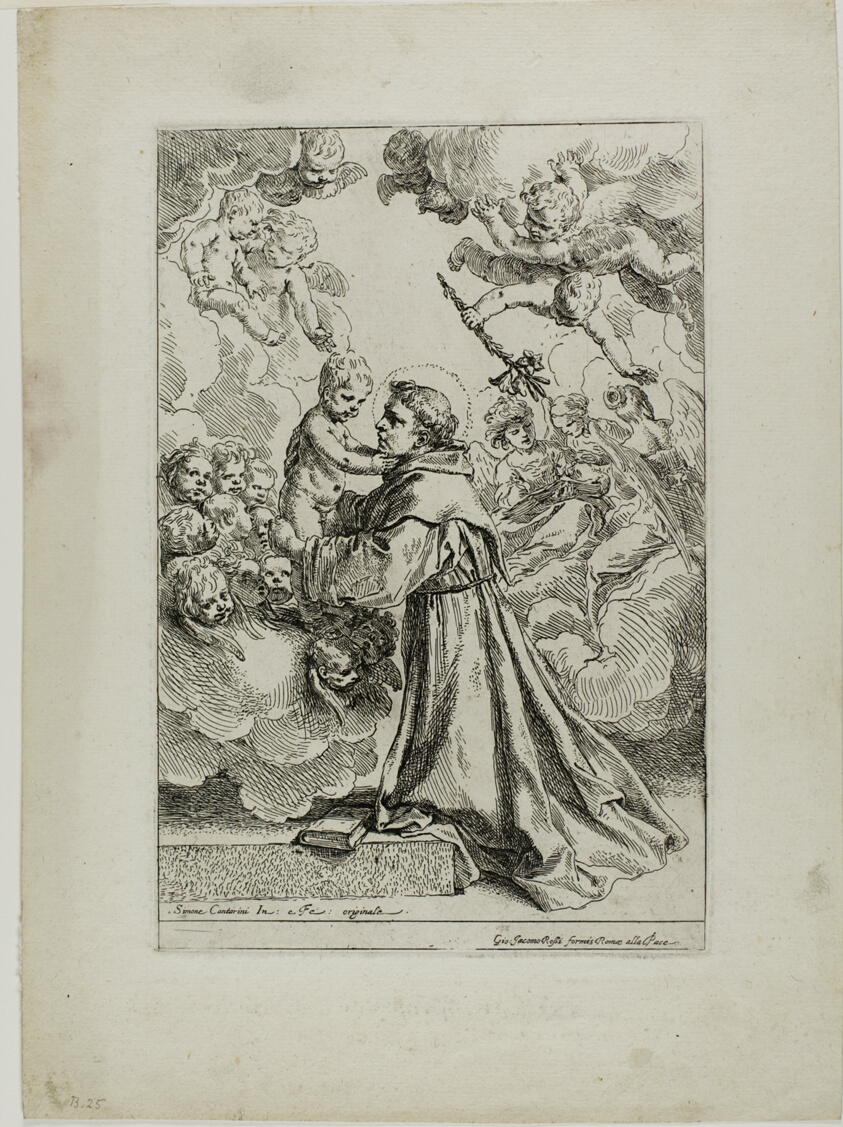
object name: Print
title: St. Anthony of Padua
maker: Simone Cantarini (Italian, 1612-1648)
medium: Etching on paper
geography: Italy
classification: etching; print; prints and drawing